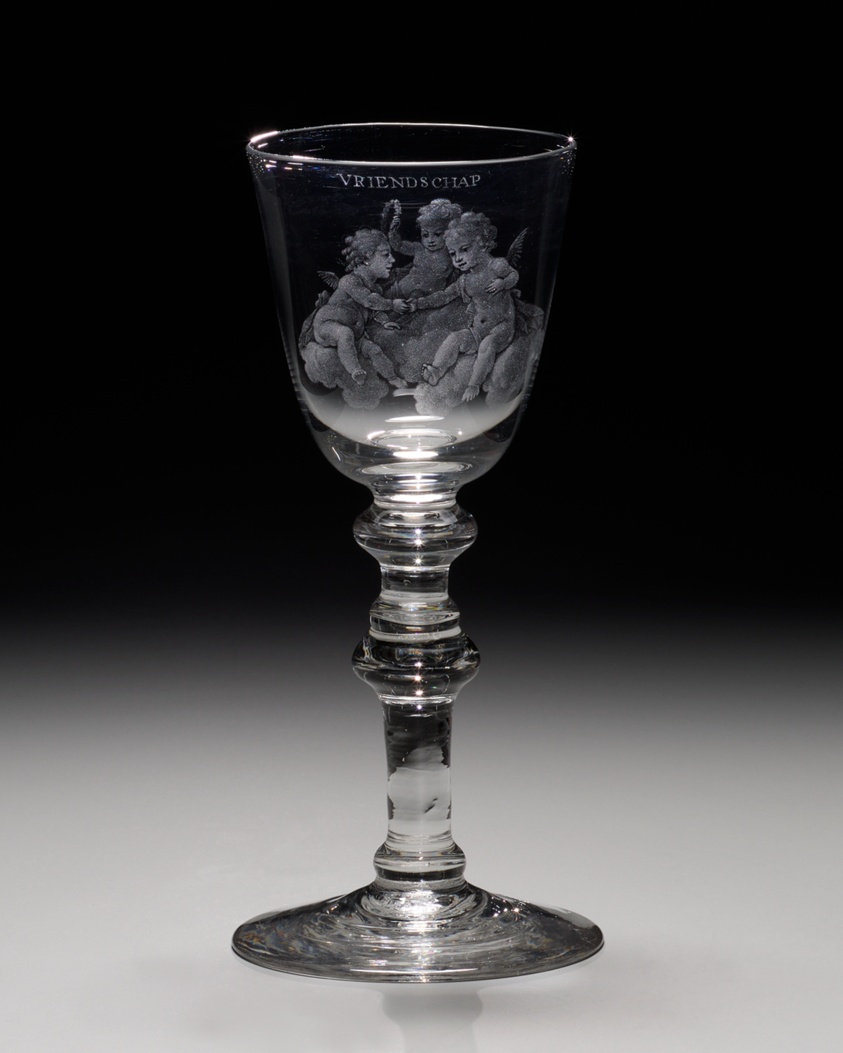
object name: Glass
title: Wine Glass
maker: England or Netherlands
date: c. 1795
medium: Glass; blown and stipple engraved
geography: England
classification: drinking vessel; glass; european decorative arts